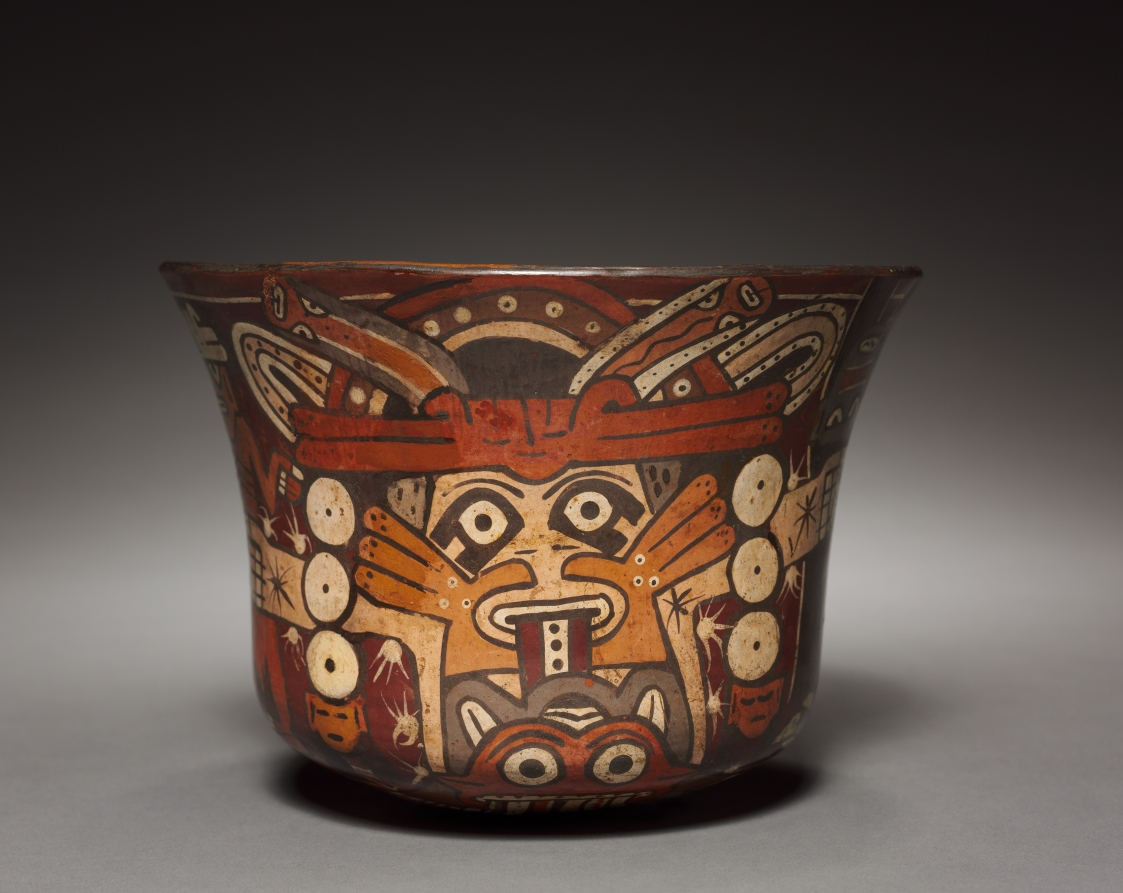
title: Bowl with Costumed Being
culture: Peru, South Coast, Nasca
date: 100 BCE–700 CE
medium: earthenware with colored slips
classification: Ceramic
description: Supernatural figures like the one on this bowl are shown wearing ornaments that actually exist-like the nearby Mouth Mask-they may represent humans clothed as deities who served as living cult images during rituals. The figure holds a severed head that probably alludes to capture of an enemy’s life force, since severed heads and fertility are linked in Nasca art.